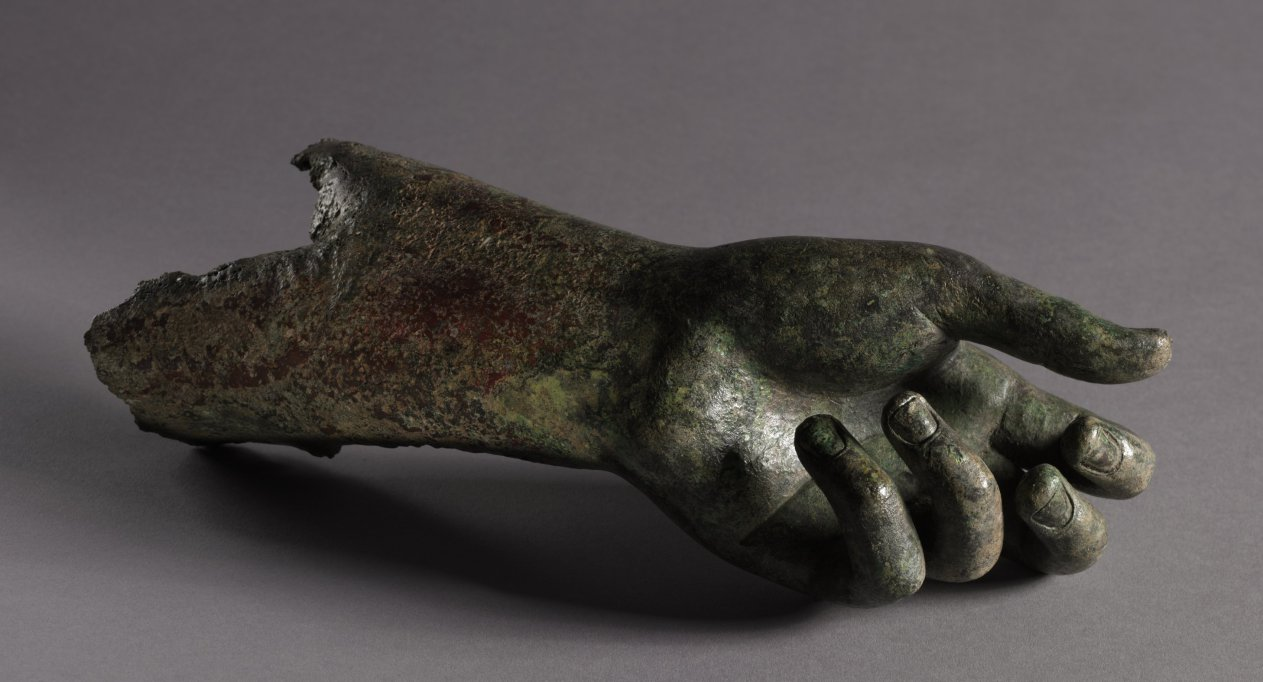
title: Detached Left Forearm and Hand of the Cleveland Apollo: Apollo Sauroktonos (Lizard-Slayer) or Apollo the Python-Slayer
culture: Greece, Athens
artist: attributed to Praxiteles (Greek, Athenian, c. 400–330 BCE)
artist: or Follower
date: c. 350–200 BCE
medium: bronze, copper and stone inlay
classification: Sculpture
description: Broken from the rest of the left arm some distance above the wrist, this fragment preserves much of the left forearm and the entire hand. The fingernails and folds of the palm are finely modeled, giving the hand a lifelike appearance. The positioning of the fingers and thumb suggests that the hand once gently grasped something, perhaps a slender branch of the now-lost tree.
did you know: The thumb and fingers are solid bronze, while the rest of this section is hollow.